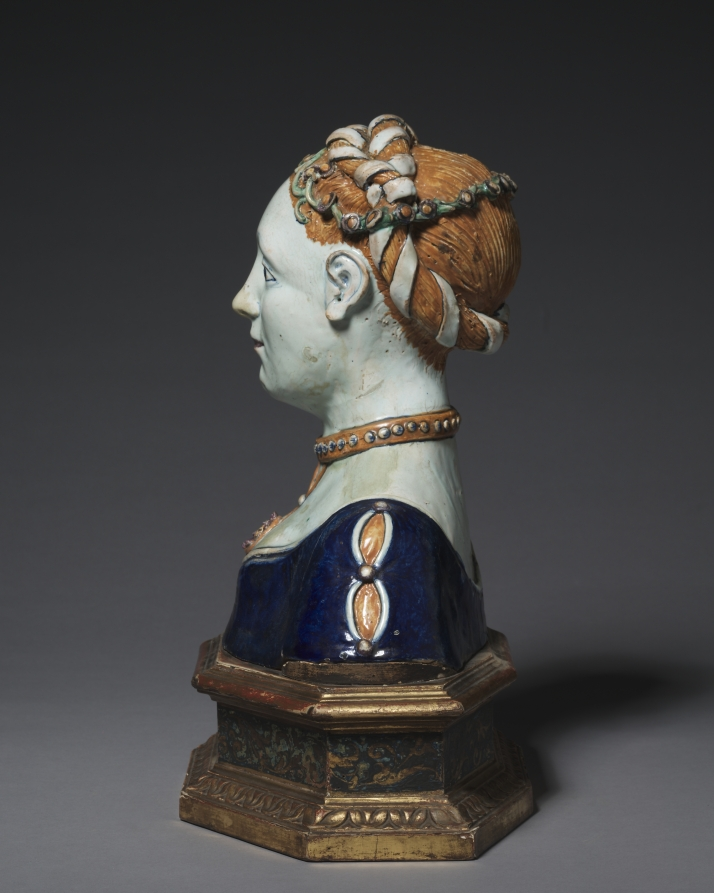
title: Bust of a Woman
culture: Italy, Tuscany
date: early 1500s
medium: tin-glazed earthenware (maiolica)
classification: Sculpture